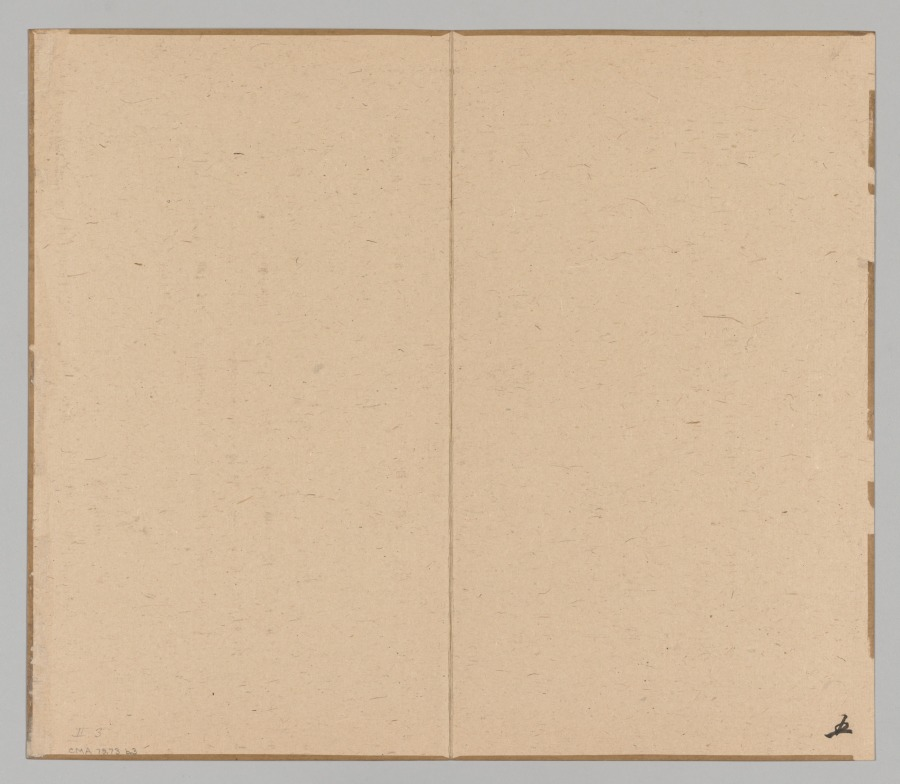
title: Reverberations of Taiga, Volume 2 (leaf 3)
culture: Japan, Edo period (1615–1868)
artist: Aoki Shukuya (Japanese, d. 1802)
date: mid- to late 1700s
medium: double-leaf from a pair of albums; ink and light color on paper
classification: Portfolio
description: Traditionally, young painters in Japan began their studies with an established master-painter. The master's compositions invariably became models that the apprentice copied to learn various ink and brush techniques. Shukuya was a pupil of the famous Kyoto artist Ikeno Taiga, whose style is reflected in these sketches of rocks, trees, and mountains.